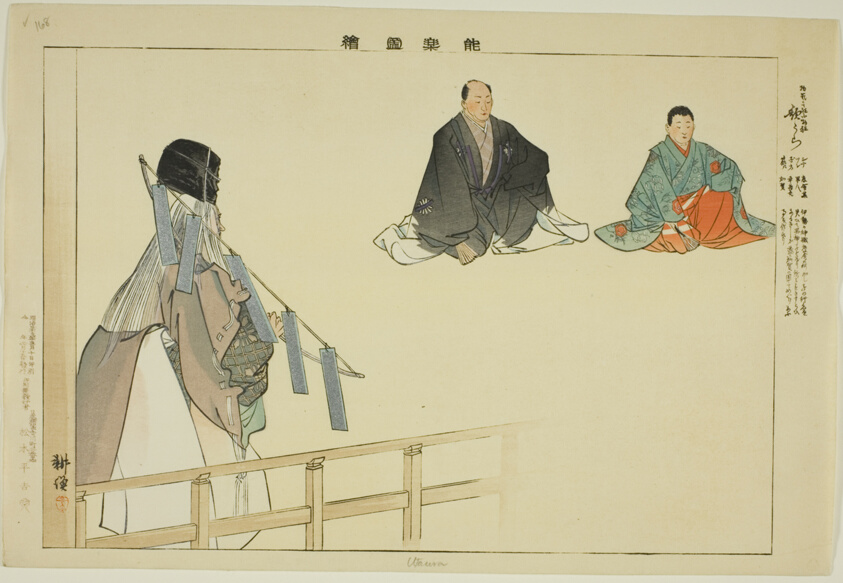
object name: Print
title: Uta-ura, from the series "Pictures of No Performances (Nogaku Zue)"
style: Japanese (culture or style)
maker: Tsukioka Kogyo; Japanese, 1869-1927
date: 1898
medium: Color woodblock print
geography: Japan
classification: woodblock print; print; asian art